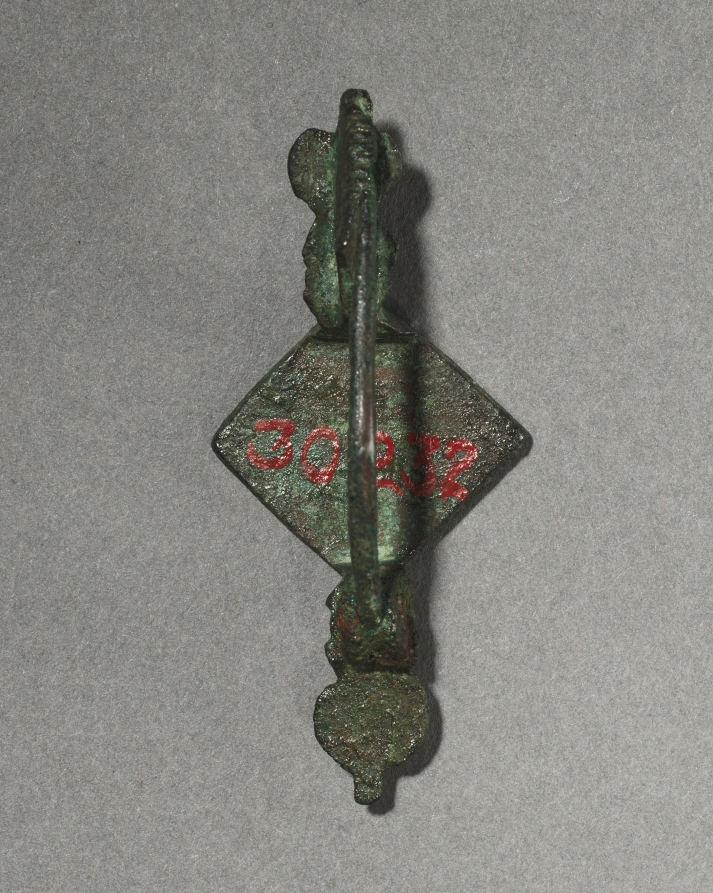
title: Ornamental Brooch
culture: Gallo-Roman or Romano-British, Migration period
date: c. 100–300 CE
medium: bronze and champlevé enamel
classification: Jewelry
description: These brooches functioned as garment clasps (much like the generally larger fibulae) and are distinctive for their decorative enamels. The art of enameling was highly popular among the conquered peoples who lived on the outskirts of the Roman empire, chiefly the Celts and the Gauls. Though the enameling technique was practiced by the Romans themselves on small objects, the brightly colored decoration readily appealed to "barbarian" taste. By the AD 200s, enameled brooches like these were being made in abundance by the native peoples of Britain and Gaul (modern France and Belgium).